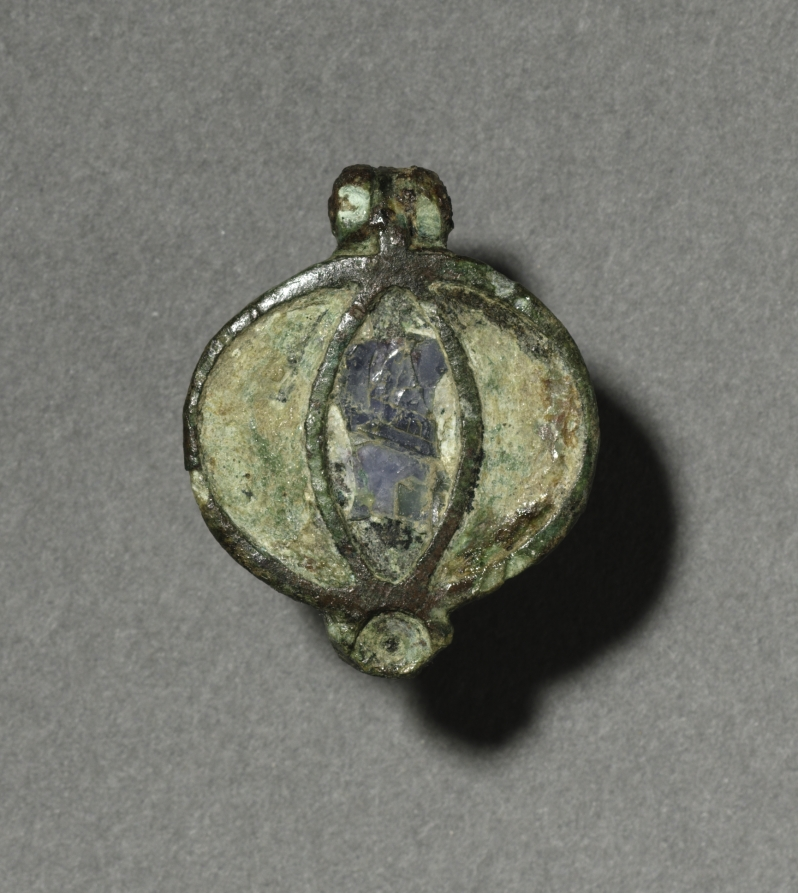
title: Ornamental Brooch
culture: Gallo-Roman or Romano-British, Migration period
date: c. 100–300 CE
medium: bronze and champlevé enamel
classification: Jewelry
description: These brooches functioned as garment clasps (much like the generally larger fibulae) and are distinctive for their decorative enamels. The art of enameling was highly popular among the conquered peoples who lived on the outskirts of the Roman empire, chiefly the Celts and the Gauls. Though the enameling technique was practiced by the Romans themselves on small objects, the brightly colored decoration readily appealed to "barbarian" taste. By the AD 200s, enameled brooches like these were being made in abundance by the native peoples of Britain and Gaul (modern France and Belgium).